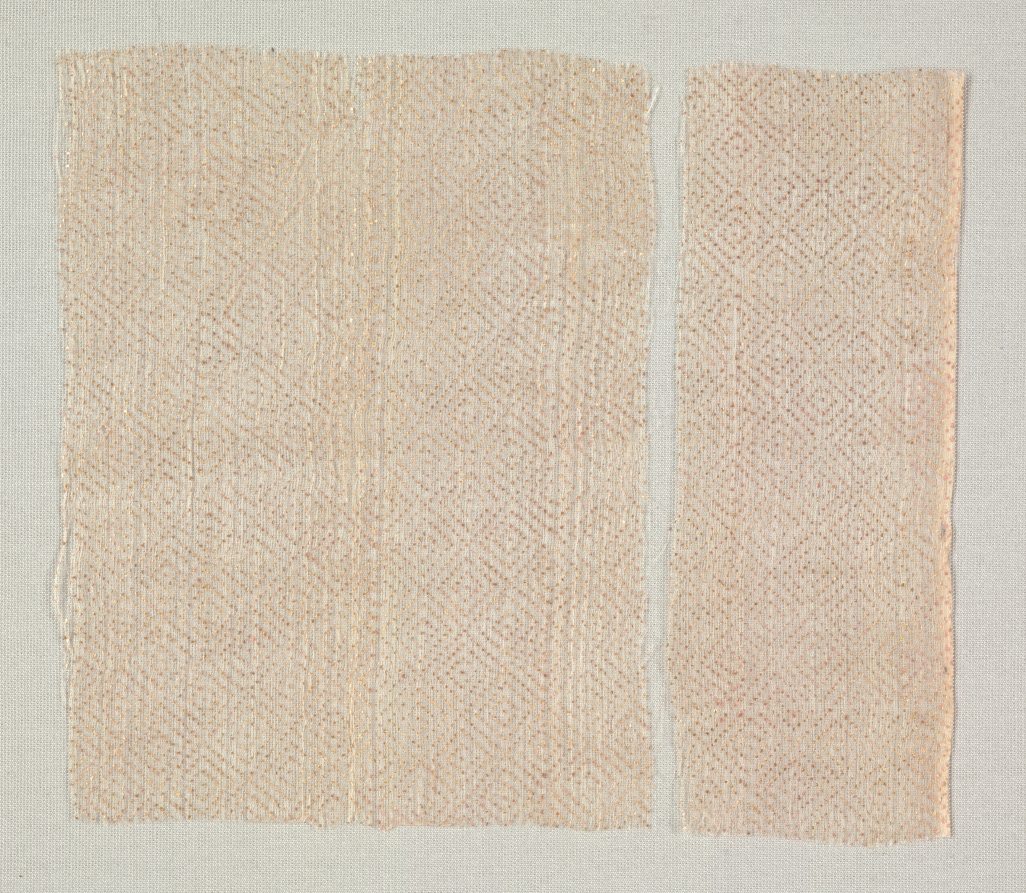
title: Fragments of Draped Court Apparel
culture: India, Rajasthan ?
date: 1800s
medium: Block printed with gold leaf (varak) on undyed plain weave cotton muslin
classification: Textile